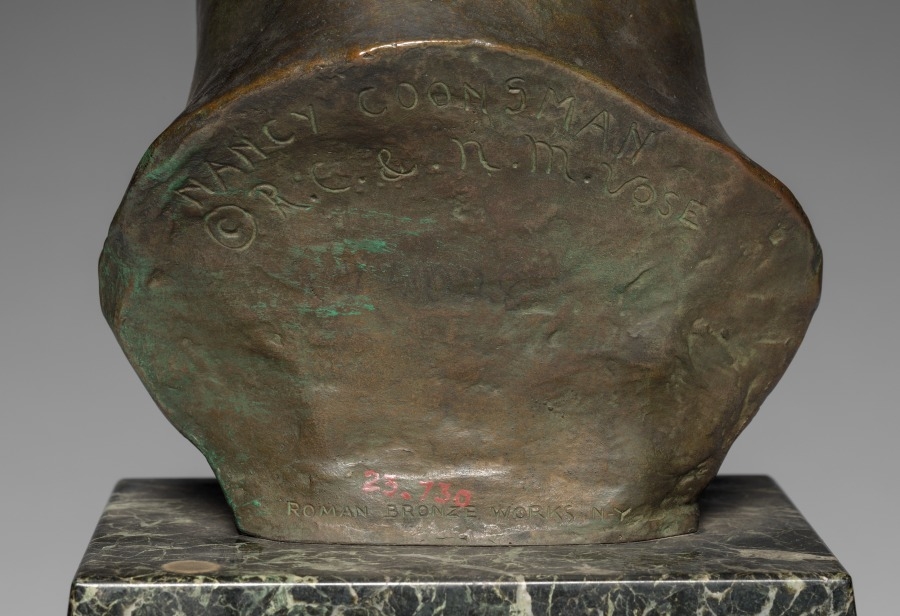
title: Head of a Girl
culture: America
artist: Nancy Coonsman (American, 1888–1920)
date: c. 1920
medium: bronze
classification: Sculpture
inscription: signed back of neck: Nancy Coonsman © R.C. & N.M. Vose/Roman Bronze Works New York.